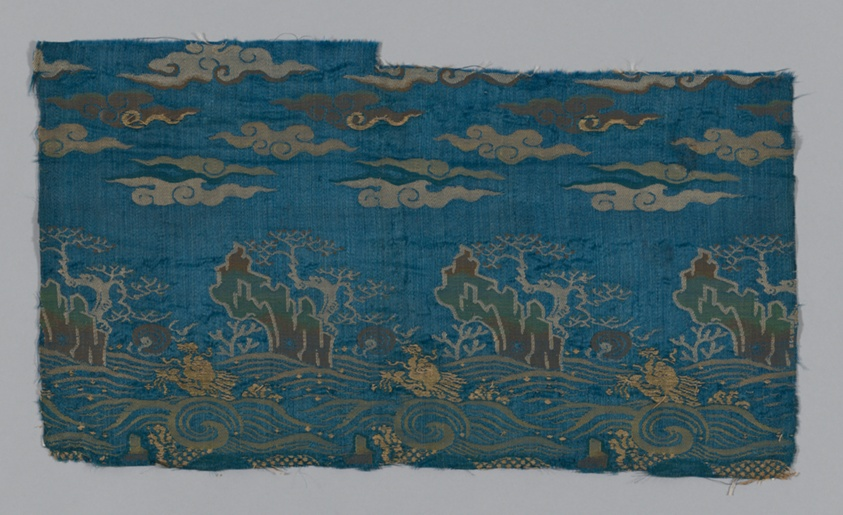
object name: Textile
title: Panel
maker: China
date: 18th century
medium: plain compound satin, silk and gilt paper; wound on cotton core.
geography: China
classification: textile; weaving